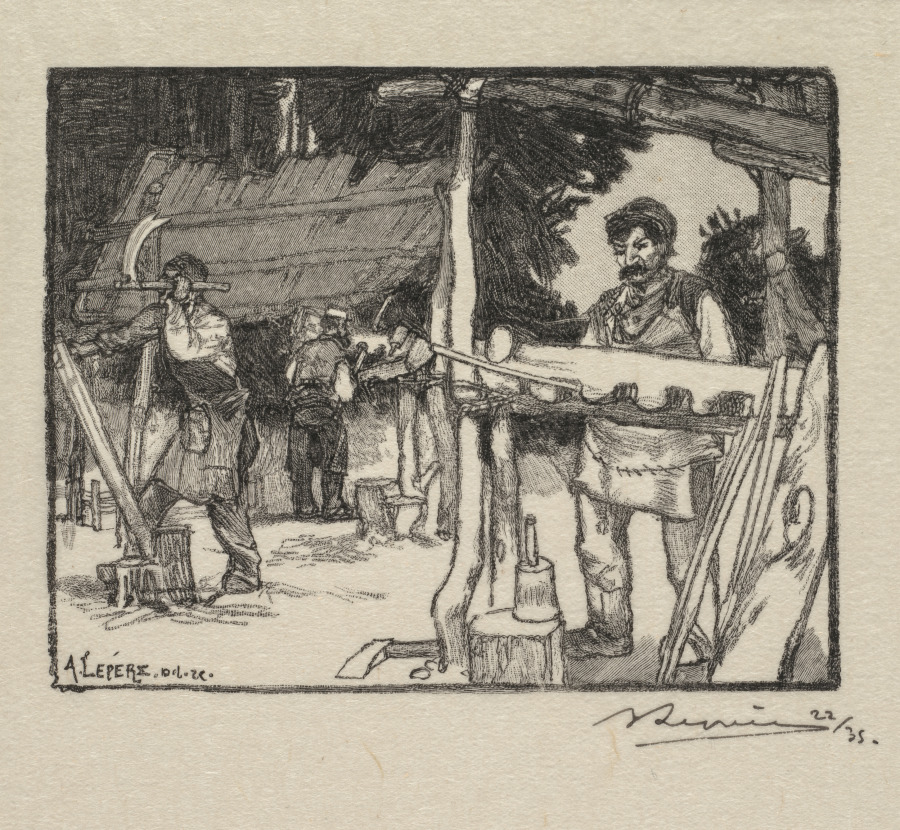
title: Fontainebleau Forest: Manufacturer of Slats (La Forêt de Fontainebleau: Le Fabricant de lattes)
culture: France, 19th century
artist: Auguste Louis Lepère (French, 1849–1918)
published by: A. Desmoulins, Published in Revue Illustrée, 1887–90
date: 1890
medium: wood engraving from bound volume of 34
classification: Bound Volume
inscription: In block, lower left: A. LEPÈRE. Del. sc; below image, lower right, in black ink: ALepère 22/35; on window mat, lower right, in graphite Fabricants de lattes